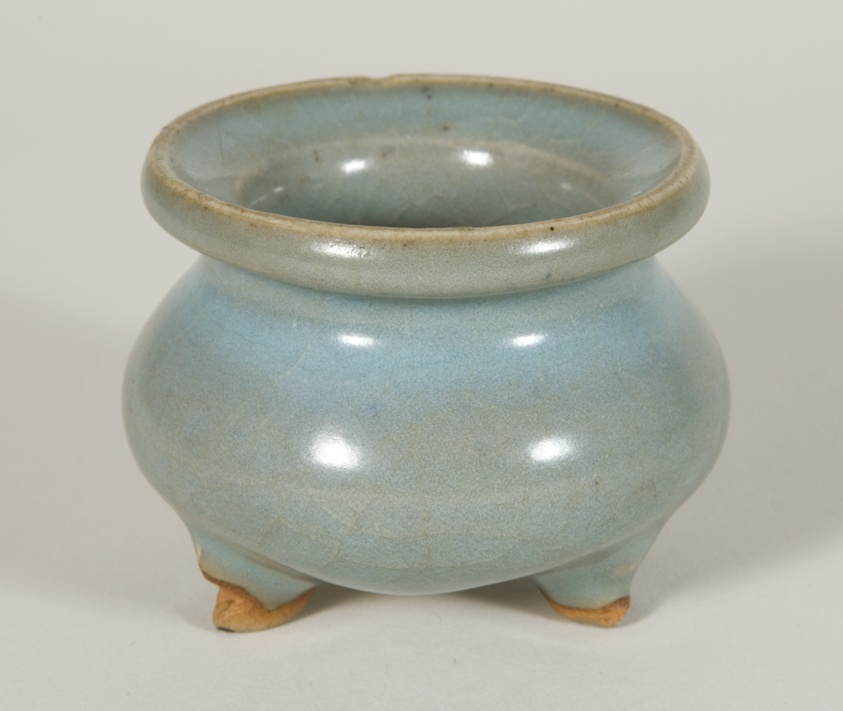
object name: Decorative Arts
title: Tripod Incense Burner (Censer)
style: Chinese (culture or style)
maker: China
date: Northern Song (960–1127) or Jin dynasty (1115–1234), c. 12th/13th century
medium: Jun ware; stoneware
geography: China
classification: ceramics; decorative arts